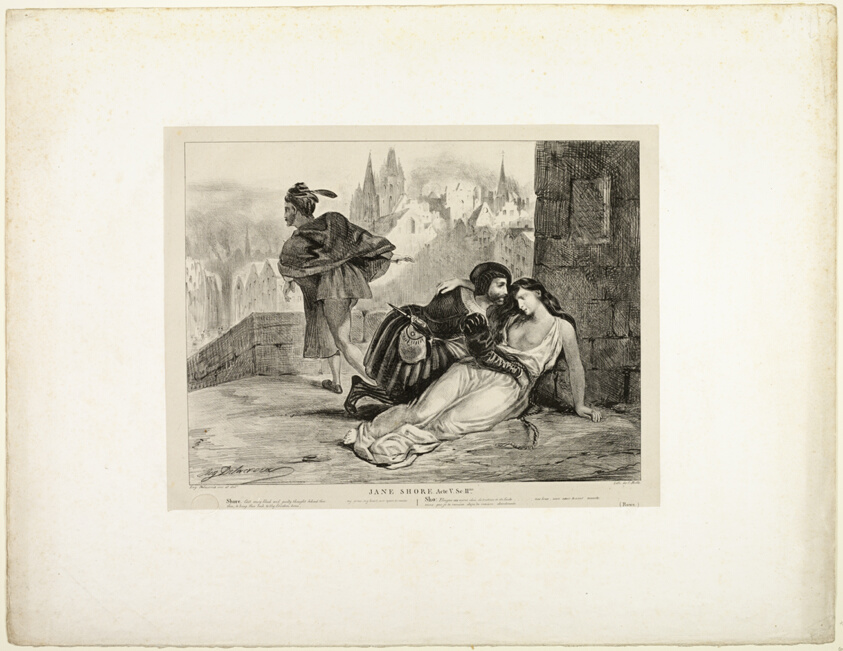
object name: Print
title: Jane Shore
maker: Eugène Delacroix (French, 1798-1863)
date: 1828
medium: Lithograph in black on light-gray China paper laid down on white wove paper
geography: France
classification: lithograph; print; prints and drawing